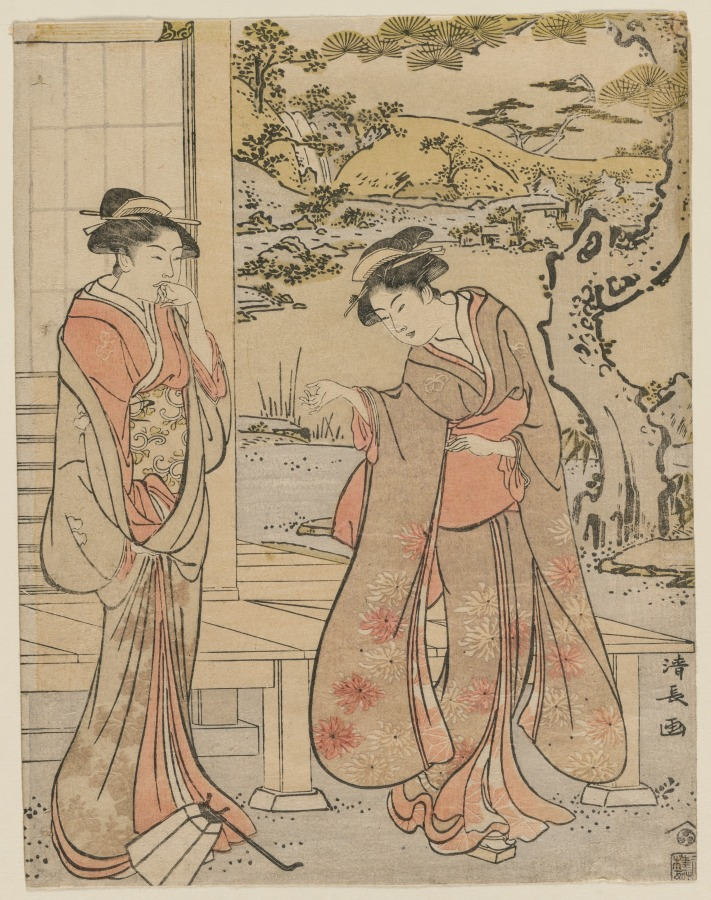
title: Woman Dropping a Lantern by a Porch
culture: Japan, Edo period (1615–1868)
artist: Torii Kiyonaga (Japanese, 1752–1815)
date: 1788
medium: color woodblock print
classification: Print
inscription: Signature: Kiyonaga ga Publisher: Nishimuraya Yohachi (Eiju han, emblem)